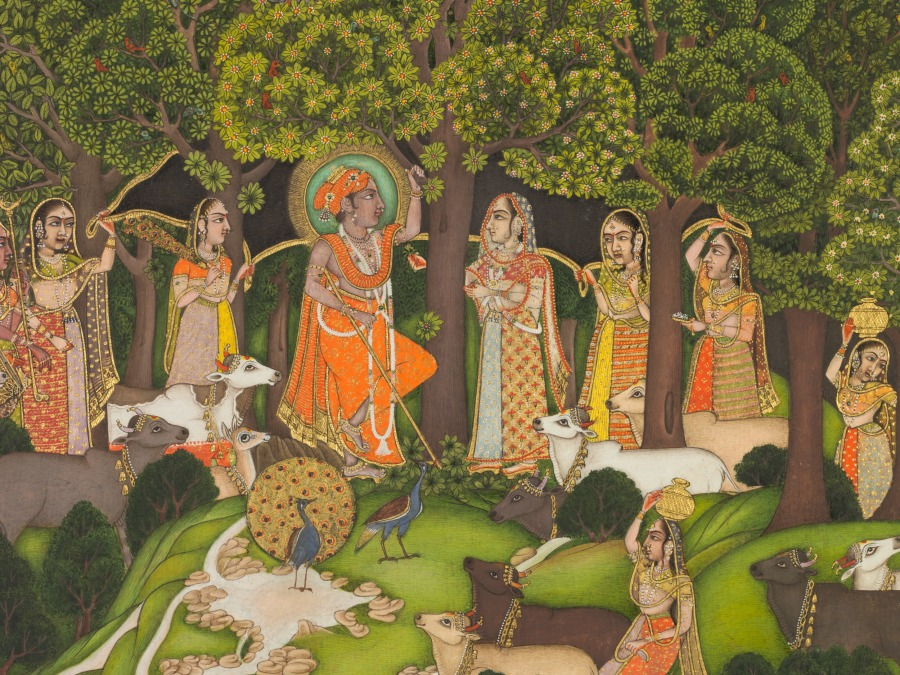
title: Radha and Krishna meet in the forest during a storm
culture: India, Bengal, Mughal, 18th century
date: c. 1770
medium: Gum tempera and gold on paper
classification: Painting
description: This painting depicts the Hindu deity Krishna as a youth among the villagers of the cowherding community where he grew up. Drawn to him, the women hurry to hold a coverlet over him in protection from the rain, not realizing that he is able to lift a mountain to shield them all. Birds and monkeys populate the trees, and a Hindu temple and palace buildings stand in the background. This vibrant work was probably made for an aristocratic Hindu ruler of territories in eastern India during the period when Mughal artists dispersed from the imperial center after the invasion of Delhi in 1739.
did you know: The belly of the white cow has been colored orange with henna.